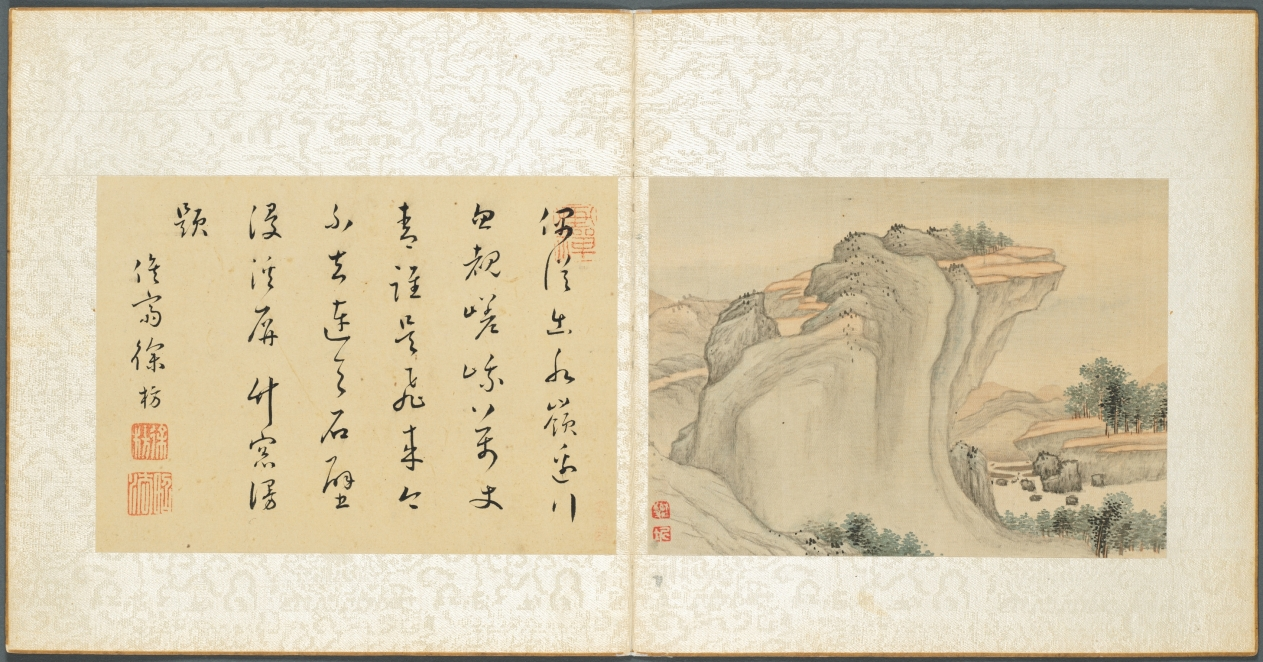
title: Album of Miscellaneous Subjects, Leaf 4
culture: China, Qing dynasty (1644-1911)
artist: Fan Qi (Chinese, 1616–after 1694)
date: early 1650s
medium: album leaf, ink and color on silk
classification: Painting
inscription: Artist seal: Fan Qi 樊圻. Poem by Xu Fang 徐枋 (1622–1694): By chance, I start my journey from the watershed to remote regions,/ Suddenly I sight the silhouette of mountains - myriad expanses of green./ What is this "Come-flying" Peak which now does not recede,/ Its rocky walls, linked to heaven, are drenched by a waterfall.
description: The fourth painting by Fan Qi alludes to Wang Wei's poetic lines: In empty hills, there is no one there; Yet one can hear the sound of conversation. The calligraphic colophon by Xu Fang adjacent to the painting reads: By chance, I start my journey from the watershed to remote regions, Suddenly I see the silhouette of mountains, myriad expanses of green. What is this Feilai Peak which now does not recede? Its rocky walls, linked to heaven, are drenched by a waterfall.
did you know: There is no sign of human presence in this sunny landscape dominated by a bold flat-topped cliff.